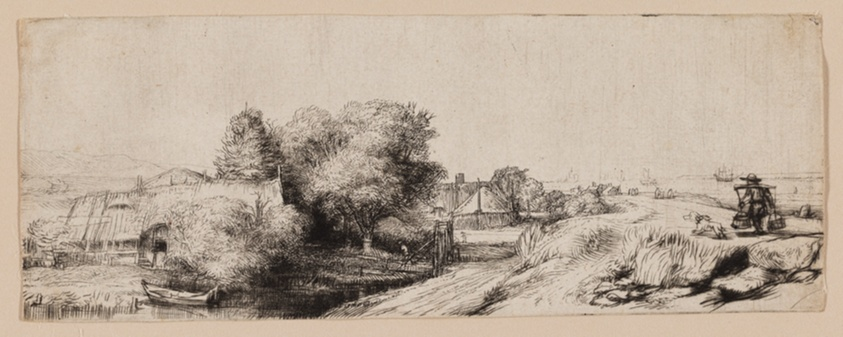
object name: Print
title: View of the Diemerdijk with a Milkman and Cottages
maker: Rembrandt van Rijn (Dutch, 1606-1669)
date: c. 1650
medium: Etching with drypoint in black on cream laid paper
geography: Holland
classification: etching; print; prints and drawing; paper; drypoint